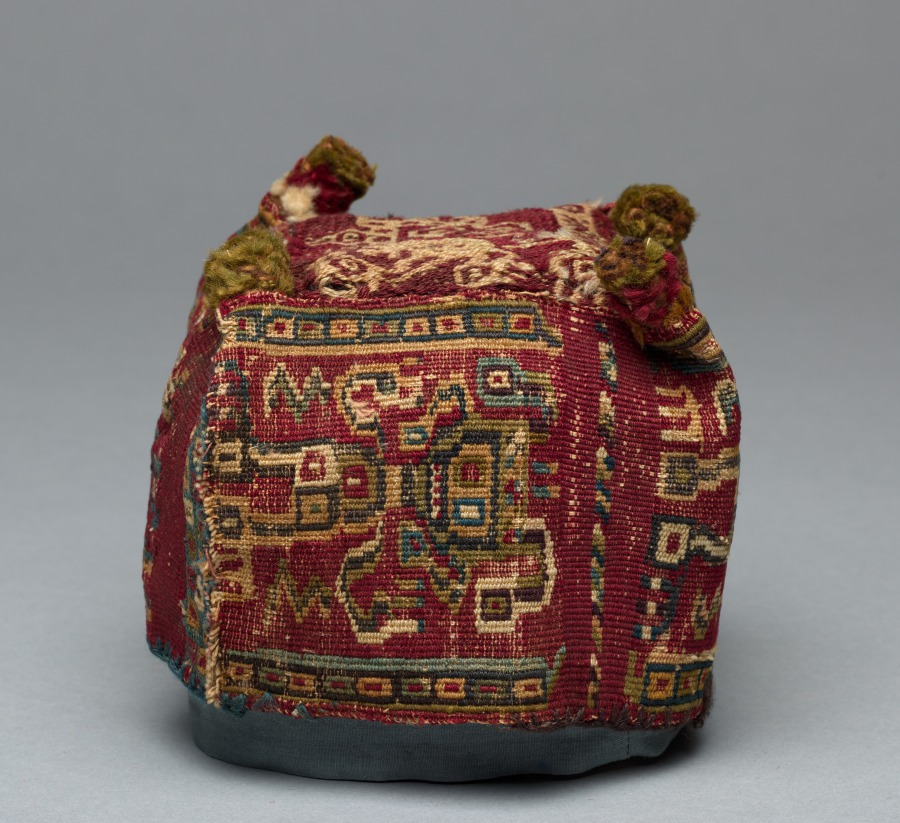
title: Four-Cornered Hat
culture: Peru, South Coast, Wari Culture, Middle Horizon, 8th-12th Century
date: c. 700–1100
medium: sides: cotton and wool plain cloth, brocaded; top: wool fancy cloth (?)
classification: Textile